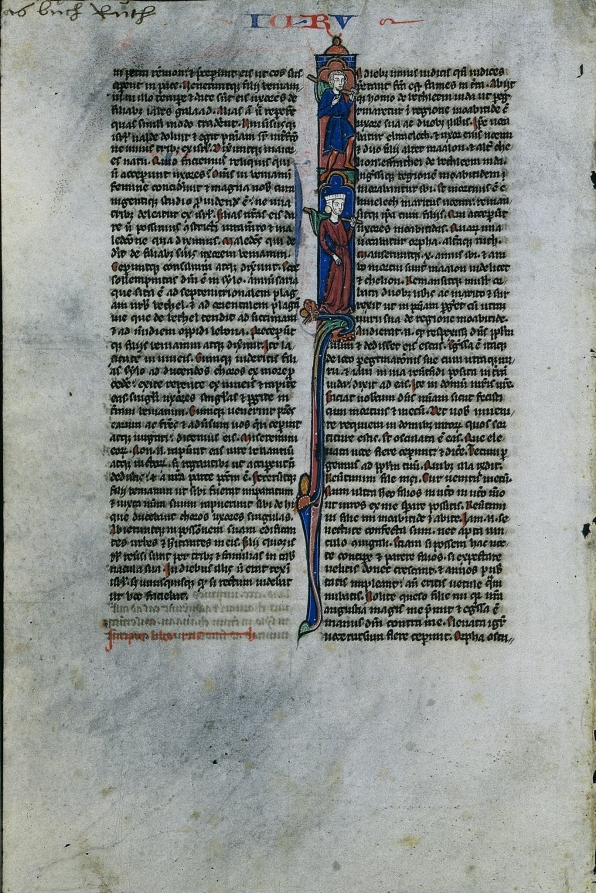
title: Initial I with Elimelech and Naomi: Leaf from a Latin Bible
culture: France, Paris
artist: Johannes Grusch Atelier (French)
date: c. 1250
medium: ink, tempera and gold on vellum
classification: Manuscript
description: The Johannes Grusch Workshop is named for the priest responsible for copying one of its bibles in 1267. The shop first appeared on the scene during the late 1230s, and an oeuvre of thirty-nine manuscripts has been identified. The workshop's oldest dated work is a missal made for Rouen Cathedral between 1235 and 1245. The style expressed by the Grusch artist consists of flat little figures with inked draperies of a fairly irregular sort. The bodies have white heads with small features, like the short-bearded chins of the men and pursed mouths. A large number of painters were apparently associated with this workshop, which changed its style considerably over its thirty-year period of activity. Its painting can be divided into early, middle, and late styles.